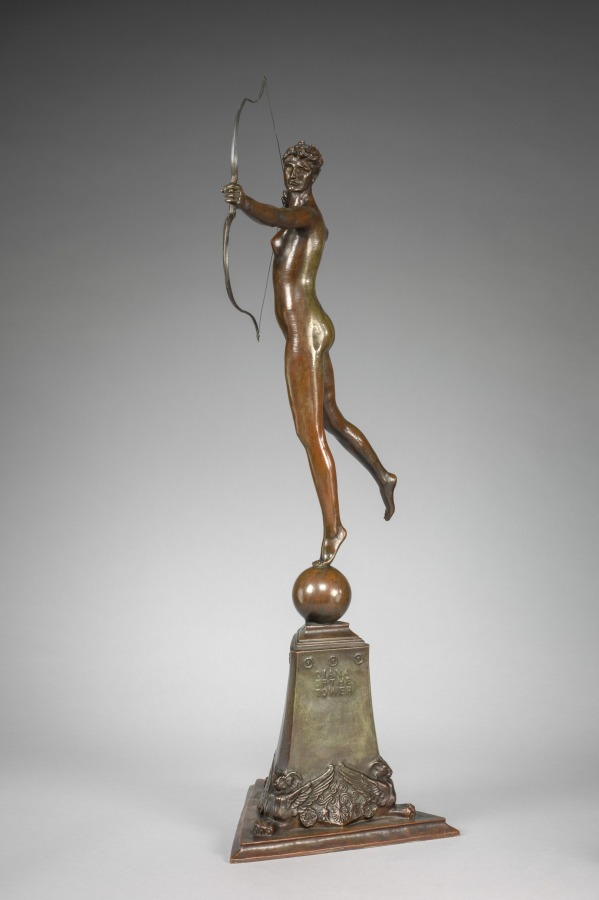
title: Diana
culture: America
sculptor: Augustus Saint-Gaudens (American, born Ireland, 1848–1907)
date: modeled 1899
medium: bronze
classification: Sculpture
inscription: Signed and dated on base: AUGUSTUS SAINT GAUDENS, MDCCCXCIX; inscribed on triangular base: DIANA OF THE TOWER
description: Depicting the Roman goddess of the hunt, Diana is a small version of the massive weathervane Augustus Saint-Gaudens designed for the second iteration of Madison Square Garden in New York, a building that was demolished in 1925. Although controversial for its nudity, the weathervane dominated the city's skyline and became a prominent landmark. Due to its popularity, Saint-Gaudens marketed tabletop versions of the sculpture, which were sold through high-end retailers such as Tiffany and Co.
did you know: The face of Diana was inspired by Davida Johnson Clark, the artist's longtime model, muse, and lover.